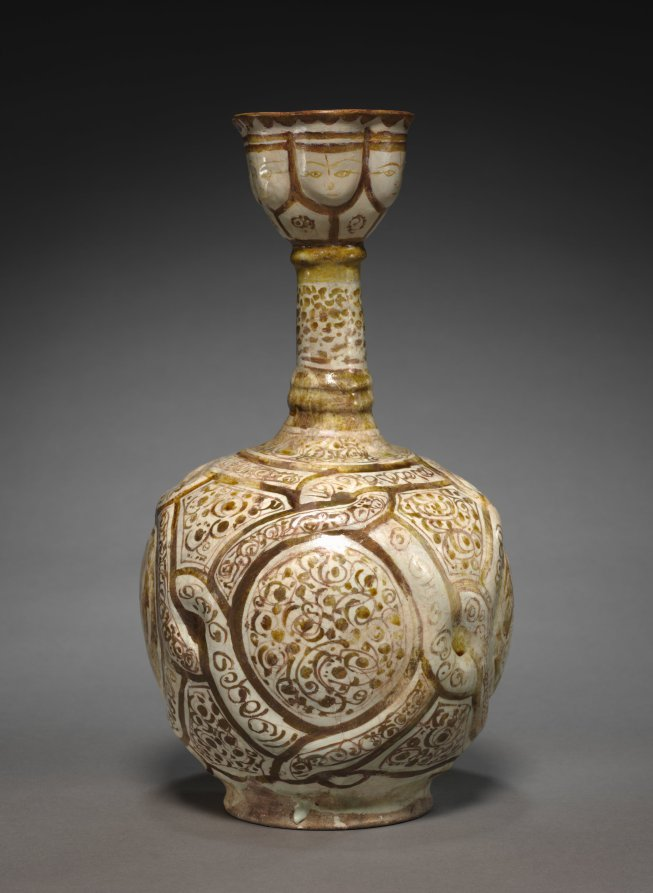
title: Jug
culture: Iran, Rayy, Seljuk period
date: late 1100s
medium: fritware with luster-painted design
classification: Ceramic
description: Fritware Where fine clay was unavailable, potters made a paste out of ground quartz, clay, and glass. When fired, the paste created a compact white material called fritware that approximated the appearance of porcelain.